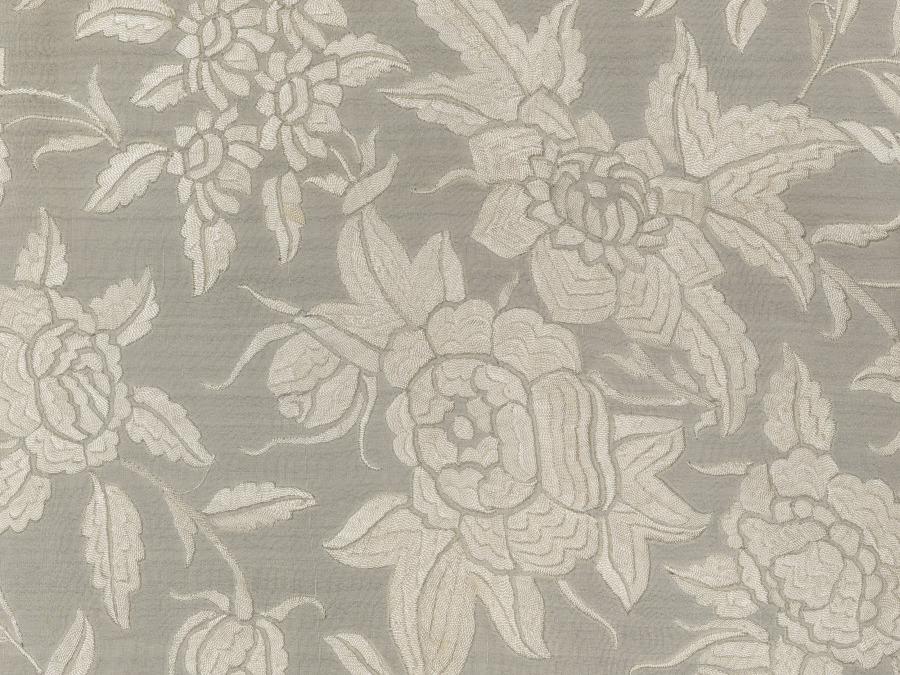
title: Silk Shawl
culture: China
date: 1800s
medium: embroidery, silk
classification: Embroidery